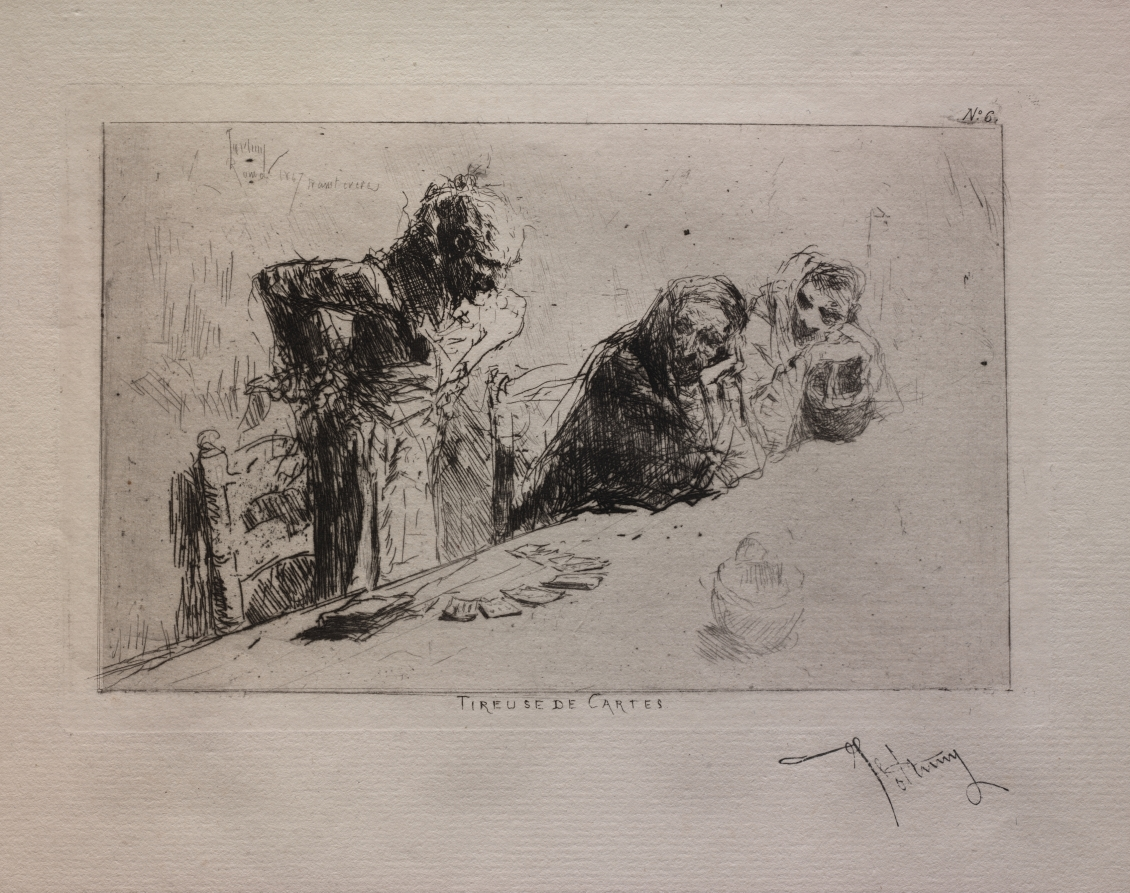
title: Fortune Teller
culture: Spain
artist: Mariano Fortuny (Spanish, 1838–1874)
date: 1867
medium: etching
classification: Print